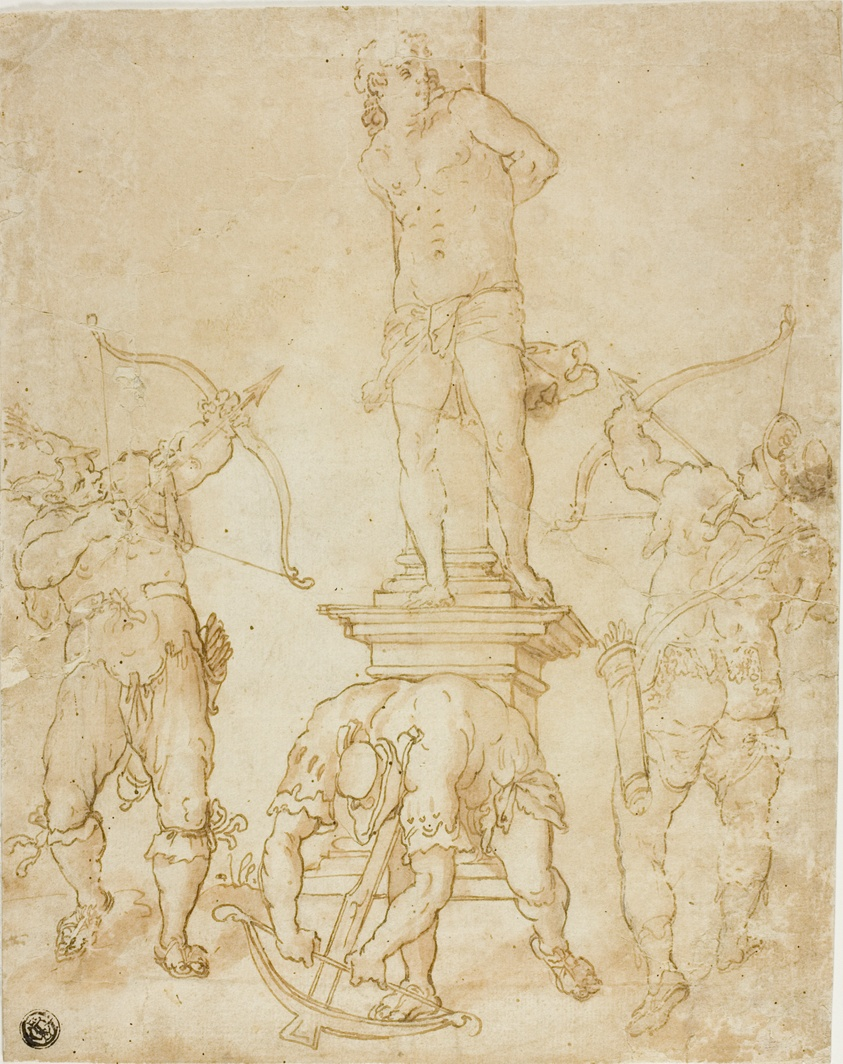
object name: Drawing and Watercolor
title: Martyrdom of Saint Sebastian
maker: Bartholomaeus Spranger (Flemish, 1546-1611)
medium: Pen and brown ink, with brush and brown wash, over traces of graphite, on tan laid paper, laid down on ivory laid paper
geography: Flanders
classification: pen and ink drawings; drawings (visual works); prints and drawing